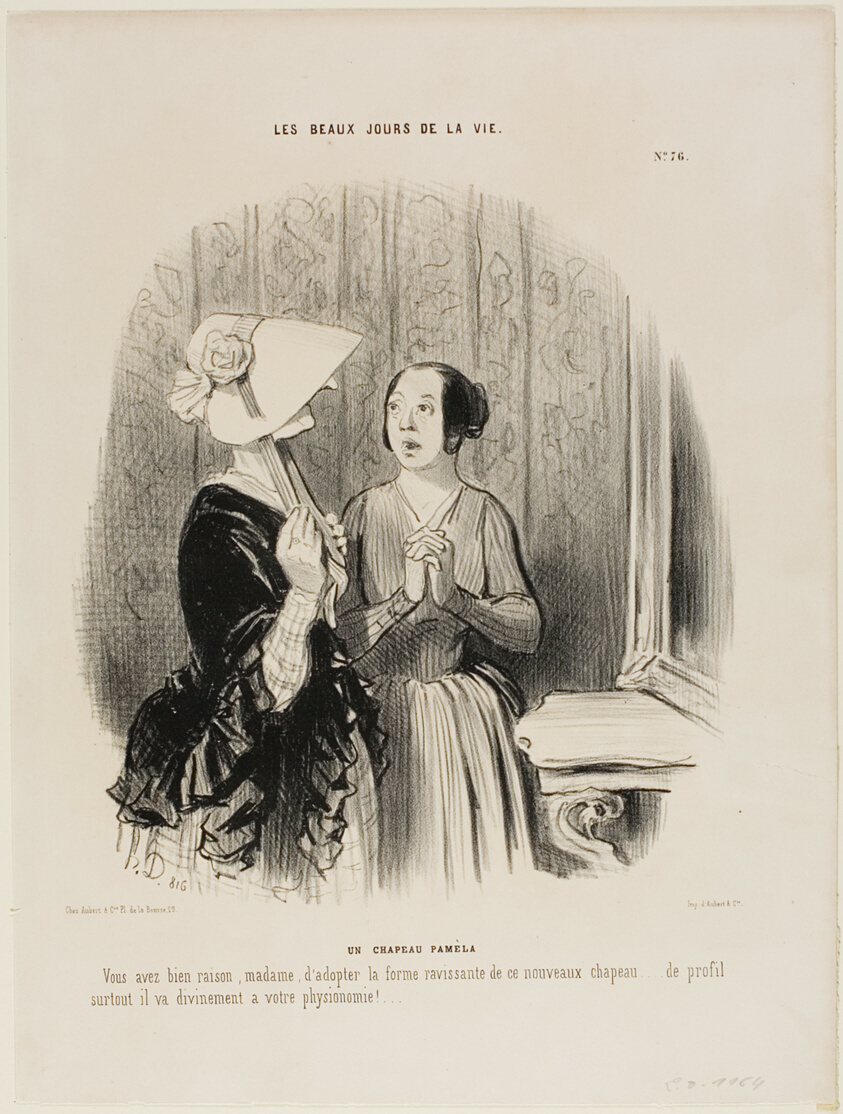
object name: Print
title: The Pamela Hat. “You are perfectly right Madame to adopt this ravishing form of a new hat...... especially from the side it matches beautifully your physiognomy.....!,”plate 76 from Les Beaux Jours De La Vie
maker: Honoré Victorin Daumier; French, 1808-1879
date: 1845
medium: Lithograph in black on ivory wove paper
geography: France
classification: lithograph; print; prints and drawing